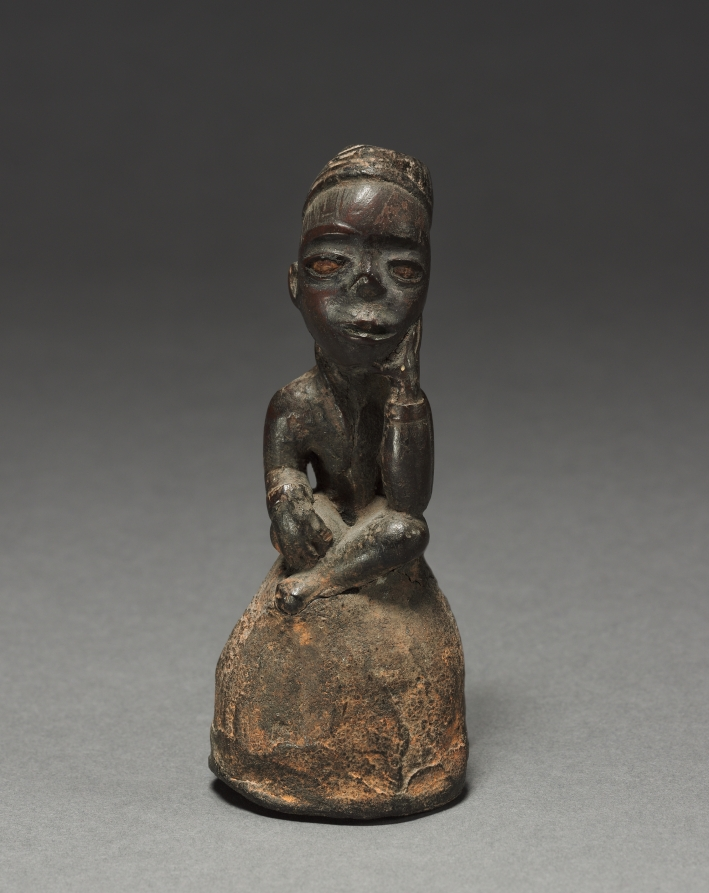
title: Power figure (nkisi)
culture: Africa, Central Africa, Republic of the Congo, Kongo-style maker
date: late 1800s-early 1900s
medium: Wood, organic materials (including resin), cloth, glass, and various other materials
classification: Sculpture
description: One of seven anthropomorphic figurines, these minkisi contained medicines in which an ancestral spirit was believed to reside. The medicines served a metaphorical rather than literal purpose in the resolution of conflicts among Kongo people. This asymmetrical figure wears a mpu headdress of chiefs with its characteristic geometric decoration. The pose may refer to a state of mourning.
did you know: Different from other Minkisi who hold their power in their abdomen, this figure sits atop a sphere in which the active substances still reside.